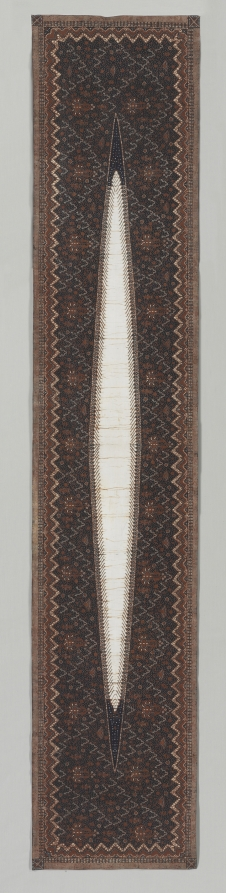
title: Slendang (Shoulder Cloth)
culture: Indonesia, Central Java, 19th - early 20th century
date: 1800s–early 1900s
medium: tabby weave, batik; cotton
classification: Textile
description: Batik is an ancient technique that was practiced in India and throughout much of Southeast Asia. With the invention of the "canting" (a tool used to apply hot wax to fabric) in the 17th - 18th centuries, however, batik bacame a particular speciality of Java. This batik was produced in the central regions of Java where cloths were resist-dyed with traditional designs in white, indigo blue, and dark brown. The stylized wing and tail of the mythical bird Garuda and the sacred mountains seen here had cosmic significance and were reserved for textiles worn by nobility for ceremonial occasions or for dance costumes. The white, elongated diamond-shaped center is unique to batik shoulder cloths.